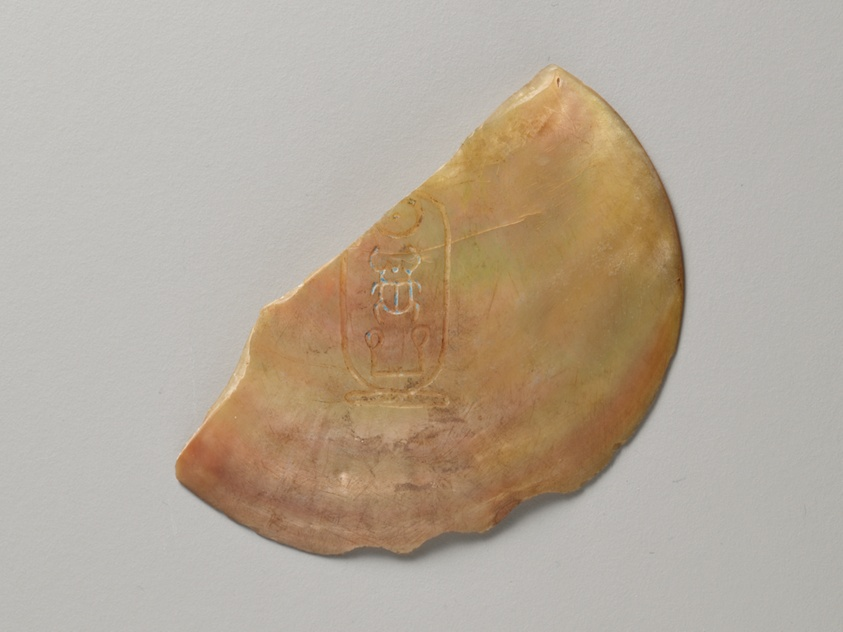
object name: Costume and Accessories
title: Pendant with the Cartouche of Kheperkare (Senwosret I)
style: twelfth dynasty, middle kingdom, ancient, egyptian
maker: Egyptian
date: Middle Kingdom, Dynasty 12 (about 1956–1911 BCE)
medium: Shell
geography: Egypt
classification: pendant (jewelry); shell; jewelry; amulet; ancient art; pectoral; costume